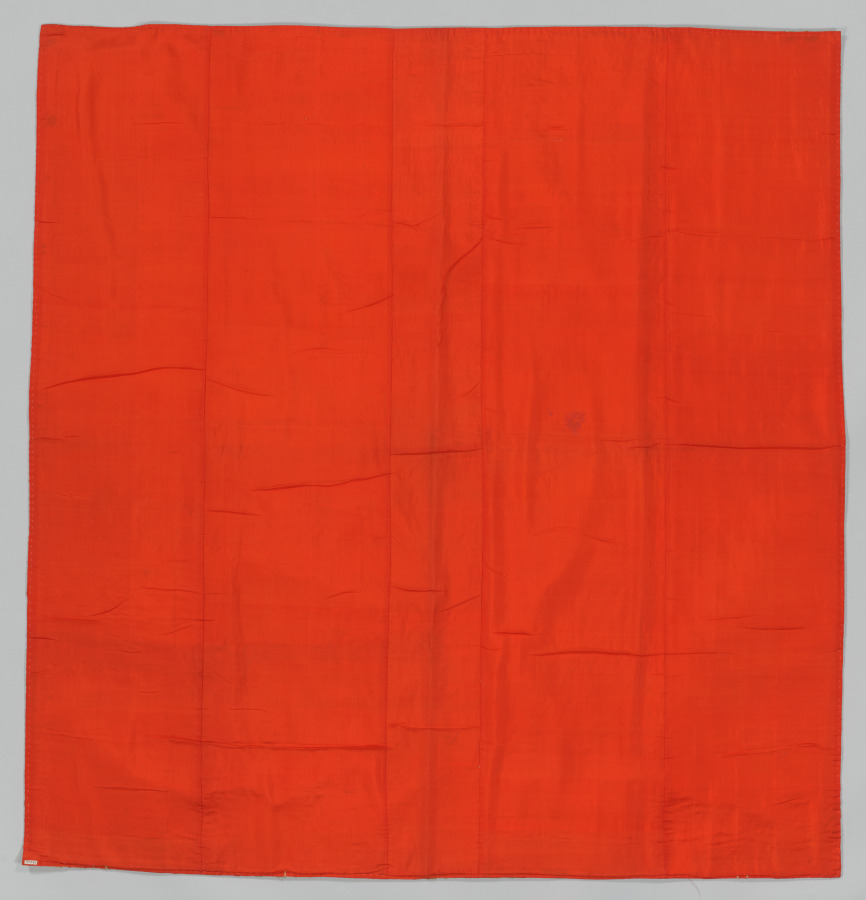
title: Hanging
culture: Japan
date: mid-1700s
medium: silk, embroidered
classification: Embroidery